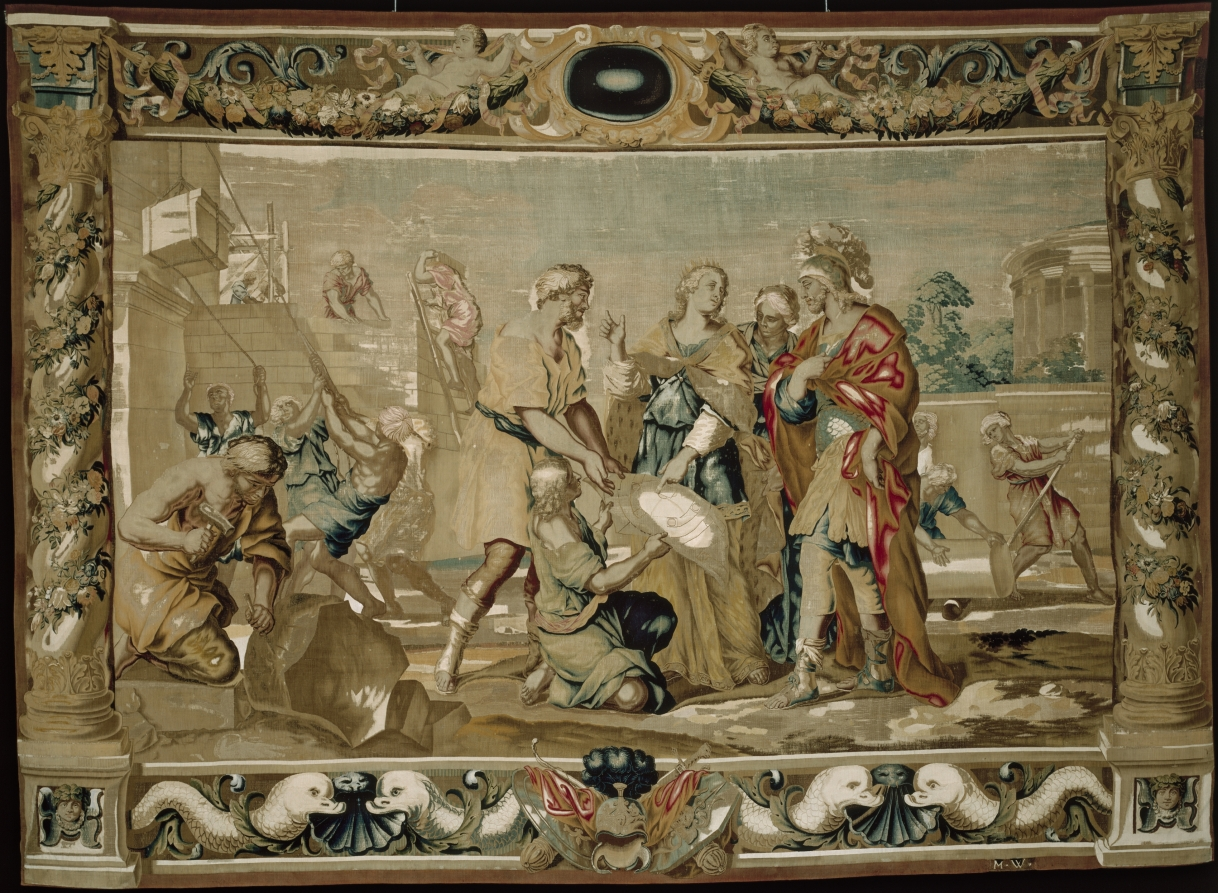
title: Dido shows Aeneas the plans for the fortifications of Carthage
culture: Belgium, 17th century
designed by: Giovanni Francesco Romanelli (Italian, 1610–1662)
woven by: Michael Wauters (Flemish, 1679)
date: 1679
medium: tapestry weave: silk and wool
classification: Tapestry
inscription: signed lower right: M. W.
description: The enamored Dido, attended by her sister Anna, shows Aeneas the building plans for Carthage which are being held by a kneeling youth and the architect.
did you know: This tapestry is one from a series of eight that depicts the tragic love story of Dido and Aeneas. They were gifted to the museum for display in the armor court.